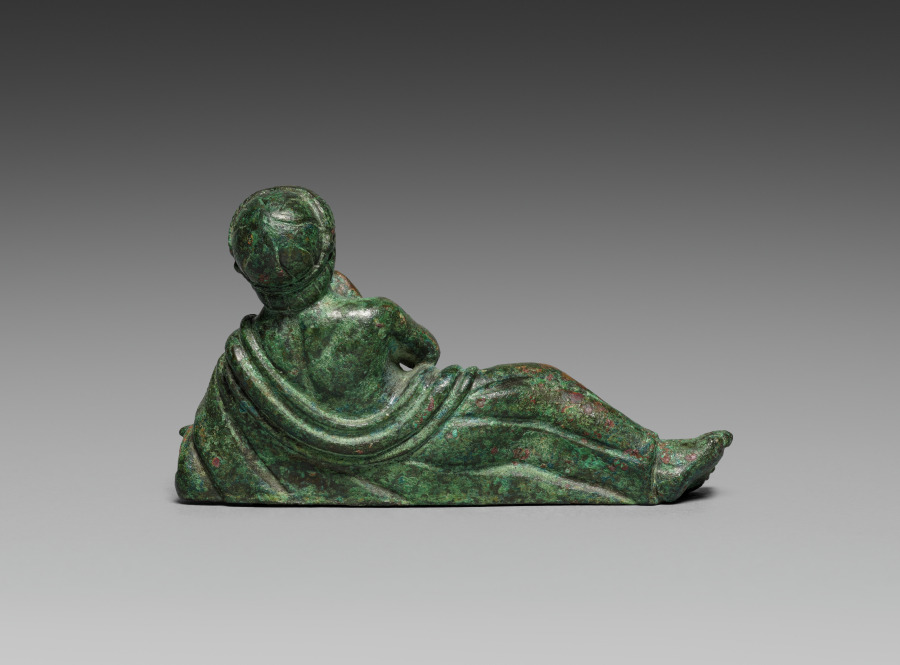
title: Vessel Ornament of Reclining Pipes Player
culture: Etruscan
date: probably 400–375 BCE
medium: bronze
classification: Sculpture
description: This bronze banqueter figurine was one of six once adorning the rim of a large basin, now lost. Cast in molds with individualized details, most have grooves on their underside to attach to the basin. Minute traces of gilding remain on areas of clothing and skin (mostly visible only under magnification), suggesting that they may have been completely gilded. Two handles in the form of hippocampi, horses with serpentine tails, also belonged to the basin and are now displayed at the Michael C. Carlos Museum at Emory University. The basin may have been used to hold liquid for a banquet, or was perhaps funerary. This bronze reclining figurine raises his head and blows into a set of pipes. The tips of the pipes are broken off. Some gilding remains on the mouth and chin. The figurine wears a himation over his body and has a bare chest. Two pillows prop up his left elbow. His hair falls over his forehead in square bangs.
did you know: Guests were often invited to play instruments and sing during symposia.